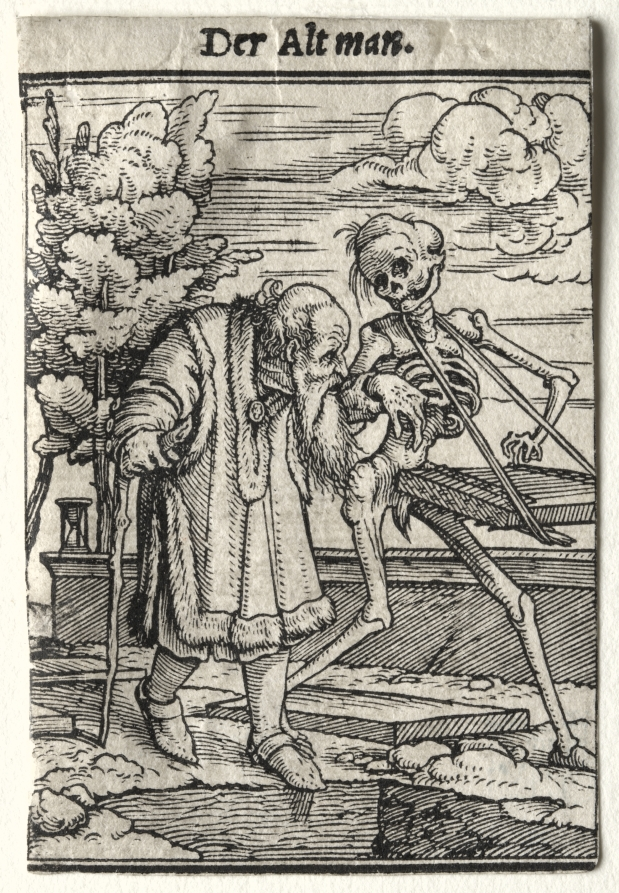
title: Dance of Death: The Old Man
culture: Germany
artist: Hans Holbein the Younger (German, active England and Switzerland, 1497/98–1543)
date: c. 1526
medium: woodcut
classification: Print